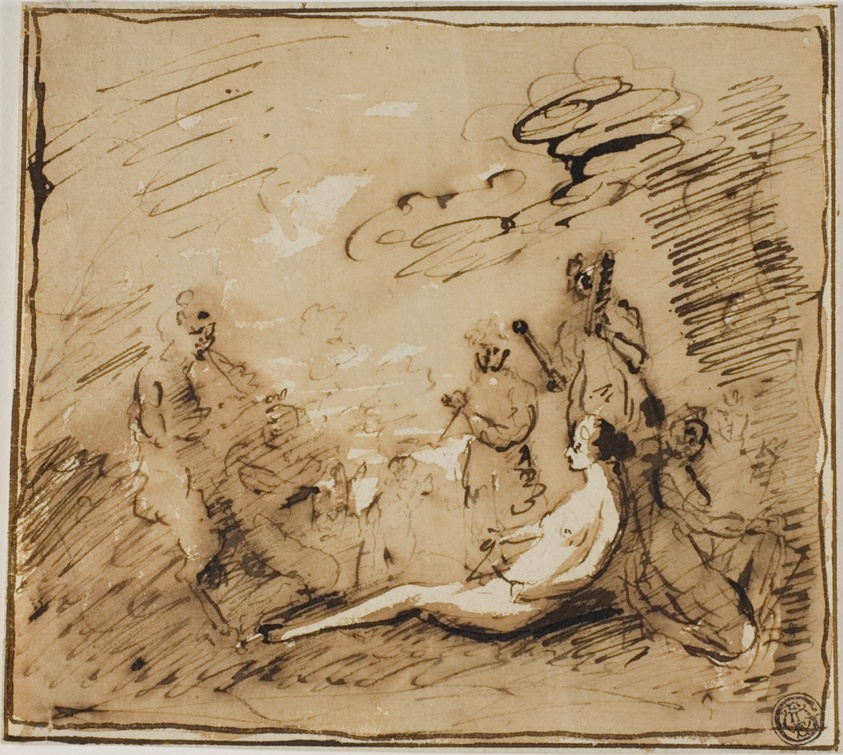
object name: Drawing and Watercolor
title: Nymphs and Satyrs Playing Musical Instruments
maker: Claude Lorrain (French, 1600-1682)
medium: Pen and brown ink, with brush and brown wash, on cream laid paper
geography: France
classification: pen and ink drawings; paper; drawings (visual works); prints and drawing